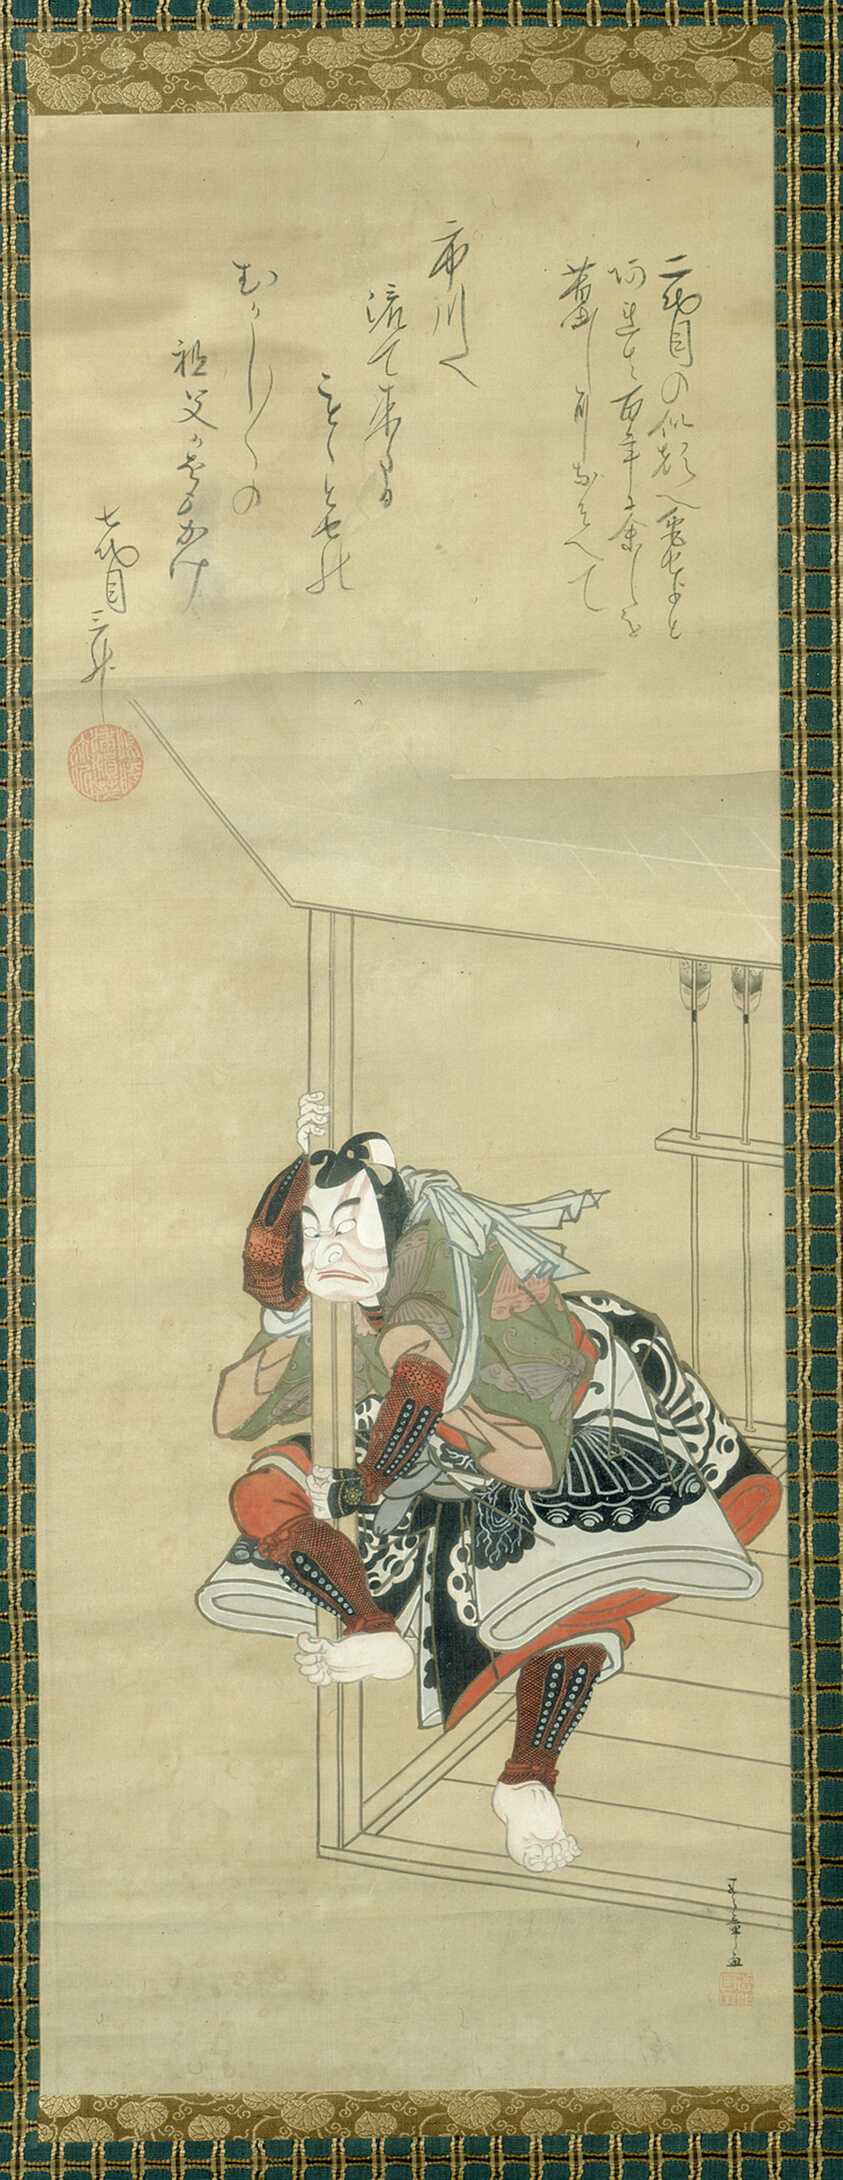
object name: Painting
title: The Kabuki Actor Ichikawa Danjûrô II (1689-1758)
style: Japanese (culture or style)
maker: Katsukawa Shunsho 勝川 春章; Japanese, 1726-1792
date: 1788 (inscription 1829)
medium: Hanging scroll; Ink and colors on silk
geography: Japan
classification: hanging scroll; painting; asian art